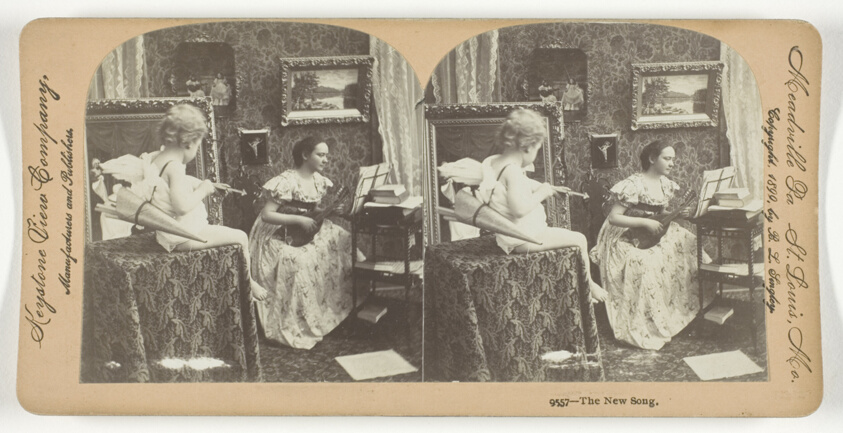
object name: Photograph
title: The New Song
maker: Keystone View Company; American, 1892-1963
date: 1899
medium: Albumen print, stereo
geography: Saint Louis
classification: photography; photograph; albumen silver print; stereograph (albumen)